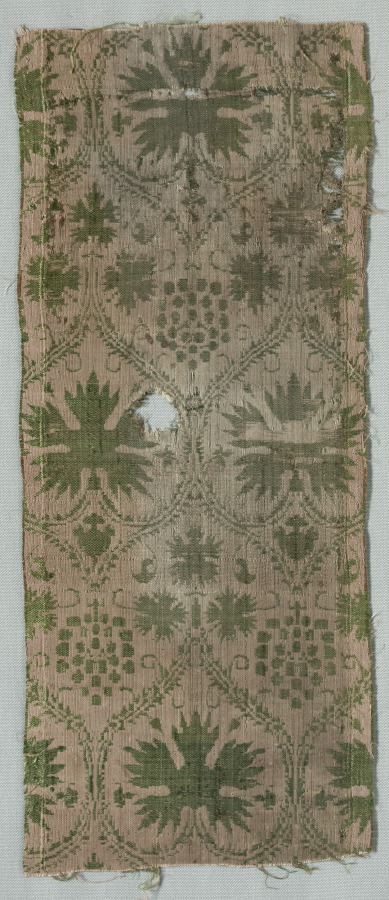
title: Silk Fragment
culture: Italy, second half of 14th century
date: c. 1360s-1380s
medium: lampas weave, silk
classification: Textile